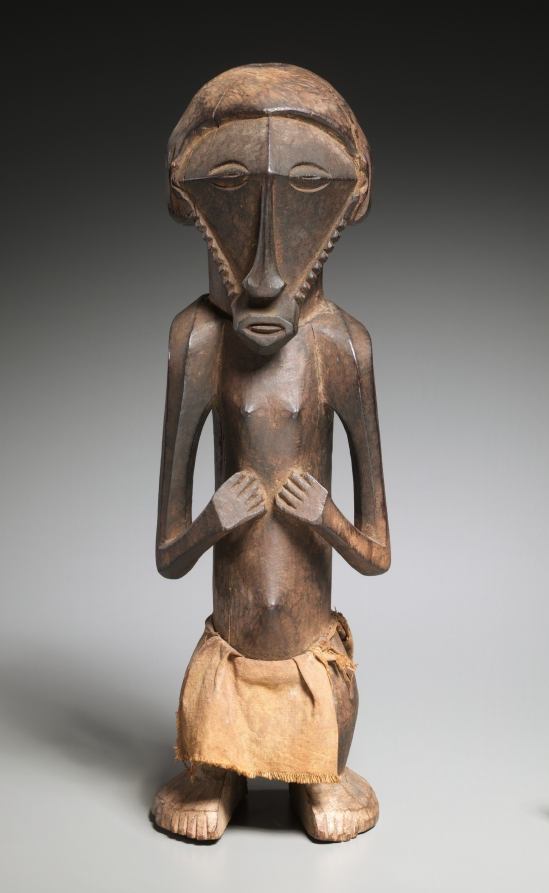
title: Shrine Figure (misi or mishi)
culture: Africa, Central Africa, Democratic Republic of Congo, pre-Bembe style or Boyo-style maker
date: late 1800s-early 1900s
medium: Wood and cotton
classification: Sculpture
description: This figure was used in an ancestral cult dedicated to the founders of small political groupings. Such figures were usually kept in the same shrine with a number of stylistically related male and female carvings that represented ancestors. At times of crisis, the custodian of the shrine spent the night in close proximity to the images, bringing offerings to the ancestors in exchange for their support.